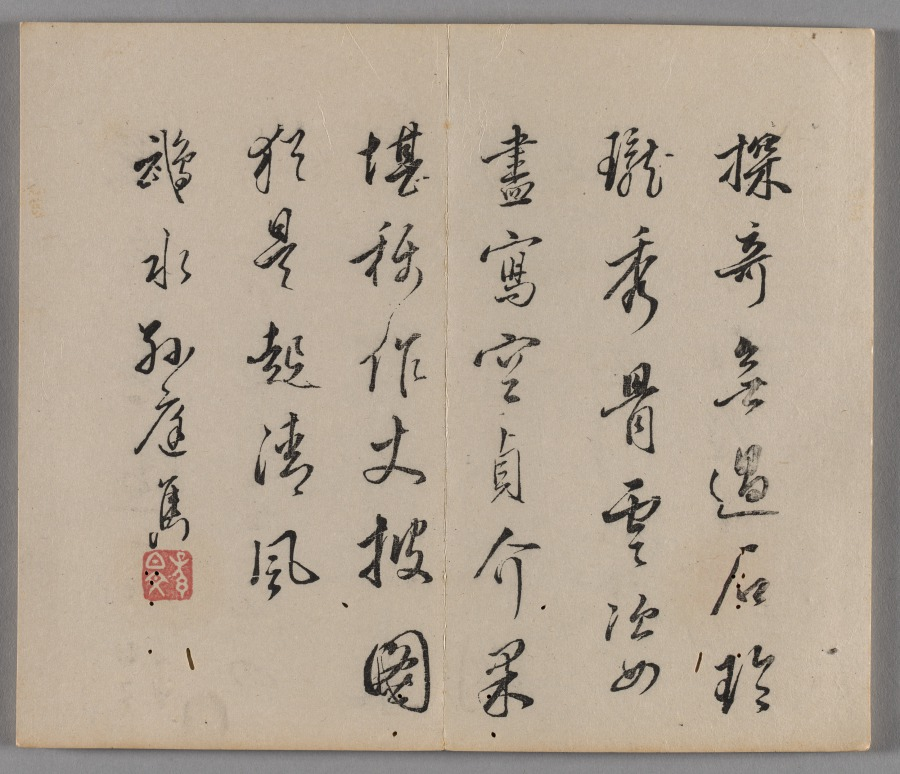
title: Ten Bamboo Studio Painting and Calligraphy Handbook (Shizhuzhai shuhua pu): Rocks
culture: China, Qing dynasty (1644-1911)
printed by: Hu Zhengyan (Chinese, c. 1584–1674)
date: 1633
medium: Woodblock-printed book; ink and colors on paper; first edition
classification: Print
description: Color printing reached a level of perfection in the early 1600s, as seen in this Ten Bamboo Studio Collection of Calligraphy and Painting and the Mustard Seed Garden Manual of Painting (printed 1679 and 1701). The painterly quality, precision in registering (aligning) the woodblocks, and harmonious colors made them the most successful color print editions in Chinese history. Both editions were printed and compiled in Nanjing, spread nationwide, and had a great impact on the arts in Japan and Korea.